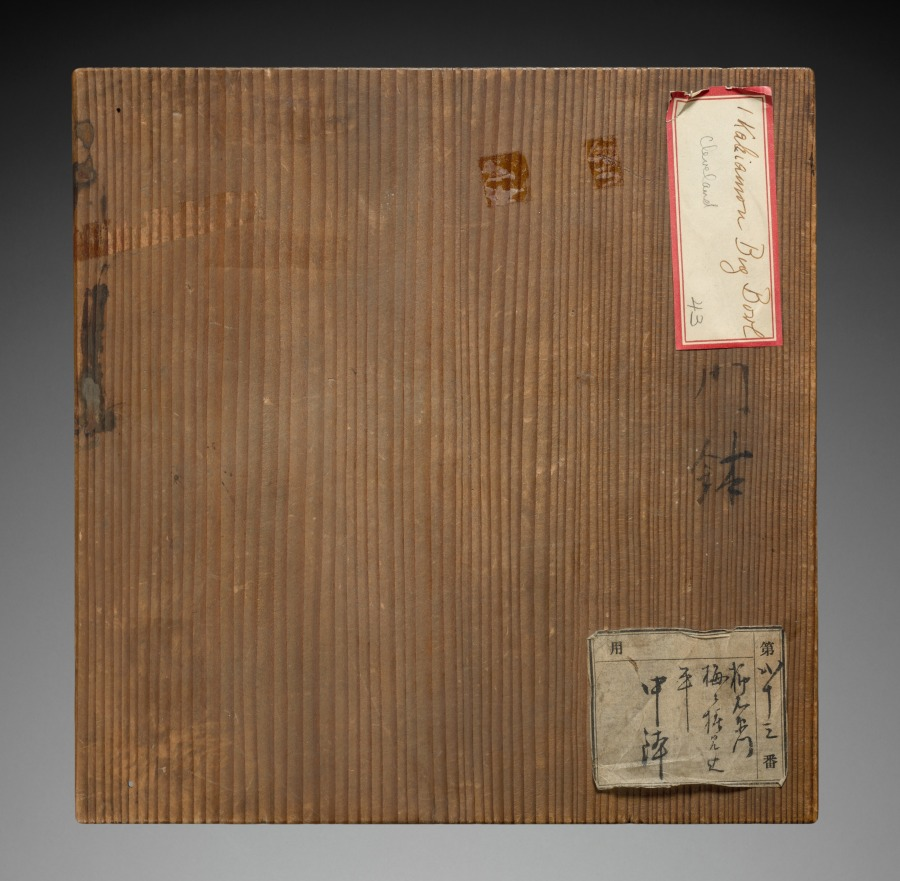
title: Bowl with Lion and Flowers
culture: Japan, Edo period (1615–1868)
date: 1700s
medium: porcelain, molded, with underglaze blue and overglaze color enamel (Hizen ware, Kakiemon type)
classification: Ceramic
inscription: 金